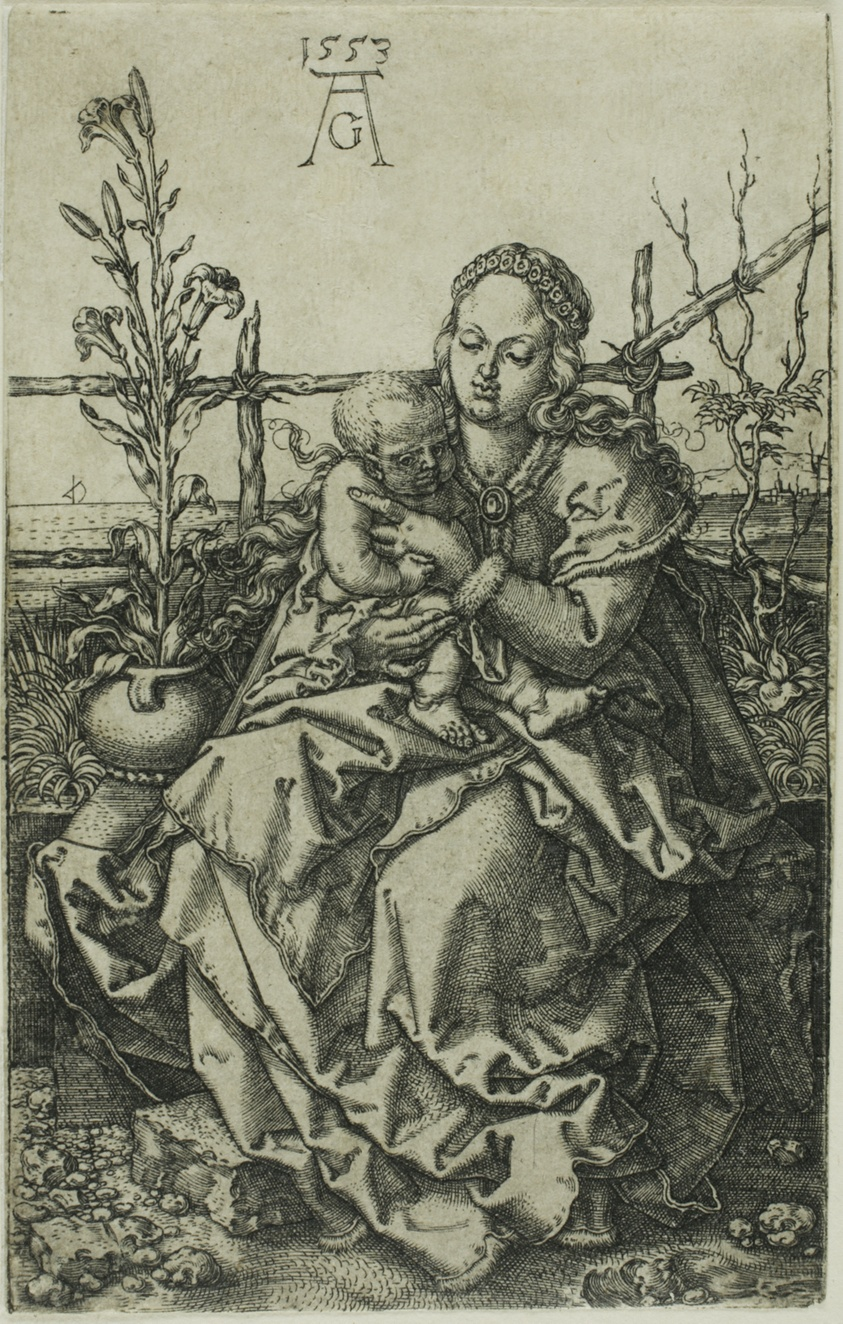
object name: Print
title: The Virgin and Child Seated on a Grassy Bank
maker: Heinrich Aldegrever (German, 1502-c.1560)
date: 1553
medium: Engraving in black on ivory laid paper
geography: Germany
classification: engraving; print; prints and drawing